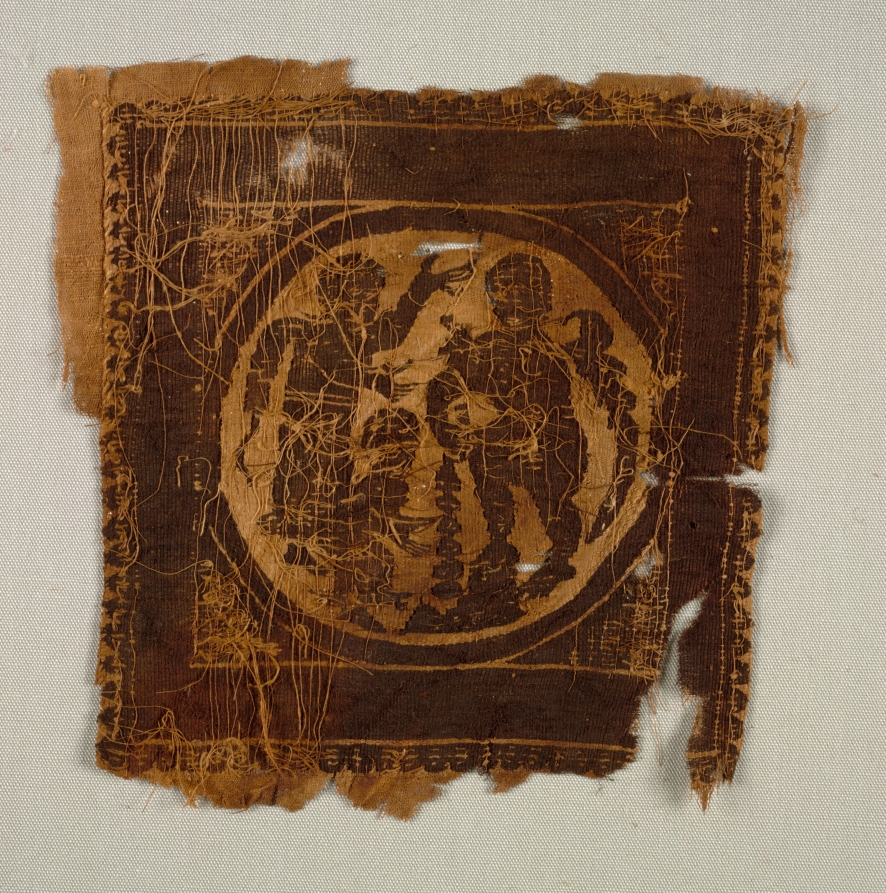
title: Ornamental Square from a Tunic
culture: Egypt, Byzantine period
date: 400s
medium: tapestry weave with supplementary weft wrapping; undyed linen and dyed wool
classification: Textile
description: This mythological scene of the first labor of Hercules––capturing the Nemean lion––originally decorated the front, back, or shoulder of a unisex linen tunic. Hercules was tasked with performing 12 labors as penance for slaying his own wife and children. Here he carries a club with a lion skin slung over his shoulder, serving as impenetrable armor. His companion, Iolaus, carries his bow and quiver on the right. The small figure in the center is unidentified. Knotted ornaments fill the corners, surrounded by a broad purple border edged with a running wave motif.